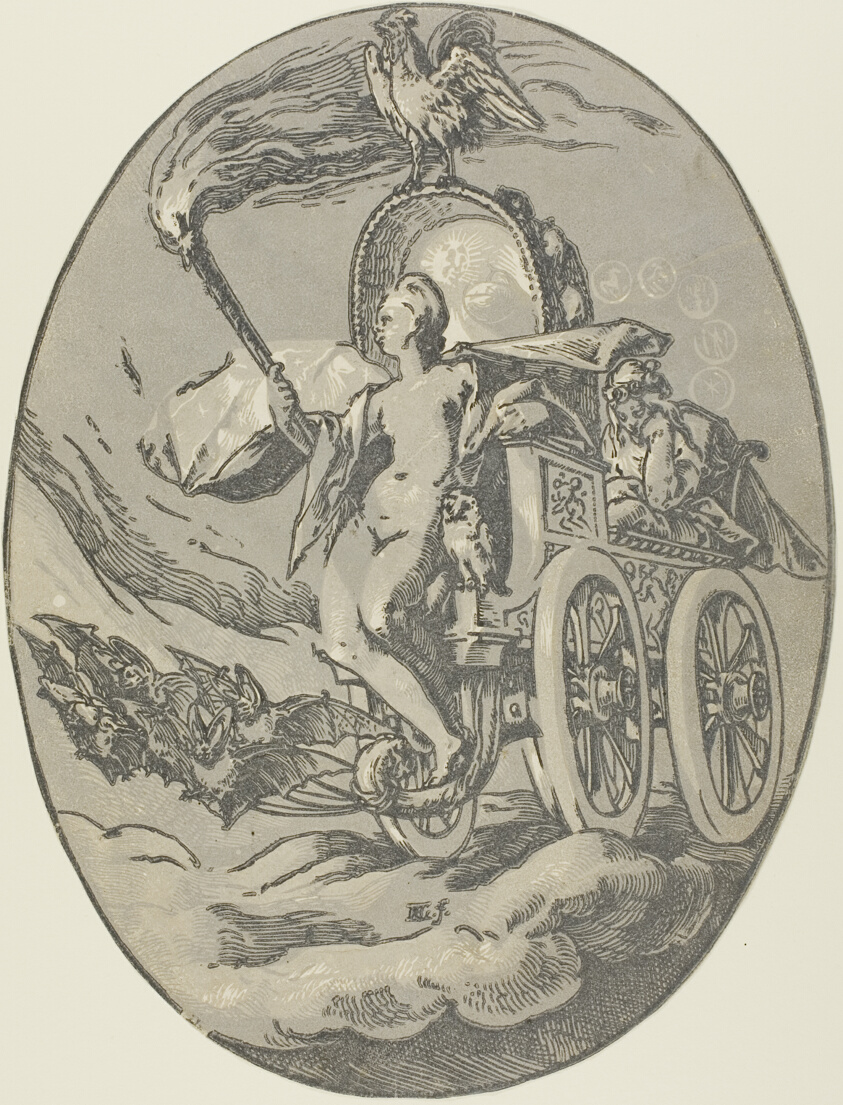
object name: Print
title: Nox, plate seven from Demogorgon and the Deities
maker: Hendrick Goltzius (Dutch, 1558-1617)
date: c. 1588–90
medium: Chiaroscuro woodcut in black and two shades of gray on paper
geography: Netherlands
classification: woodcut; print; prints and drawing